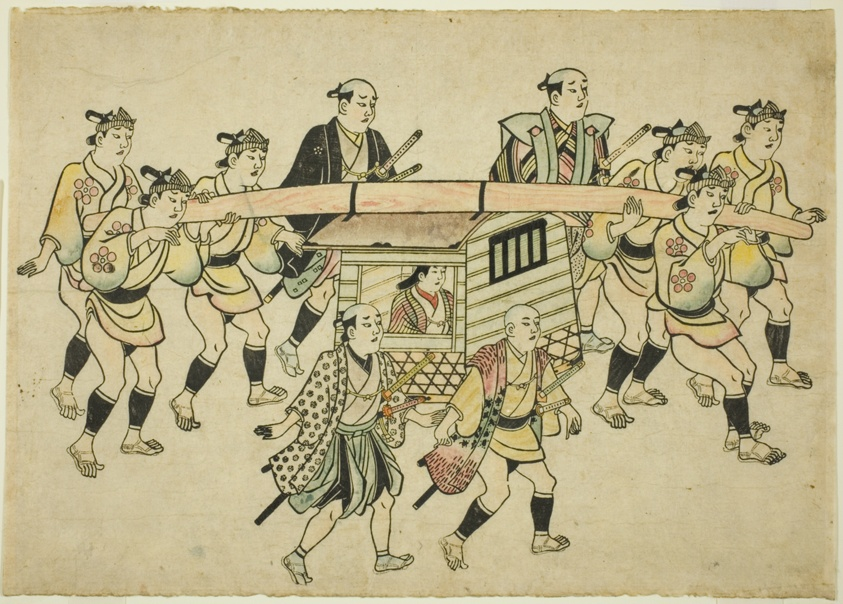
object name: Print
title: Procession of a Daimyo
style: Japanese (culture or style)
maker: Hishikawa Moronobu (Japanese, (?)-1694)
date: c. 1681/84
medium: Hand-colored woodblock print; oban yoko-e, sumizuri-e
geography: Japan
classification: woodblock print; print; asian art